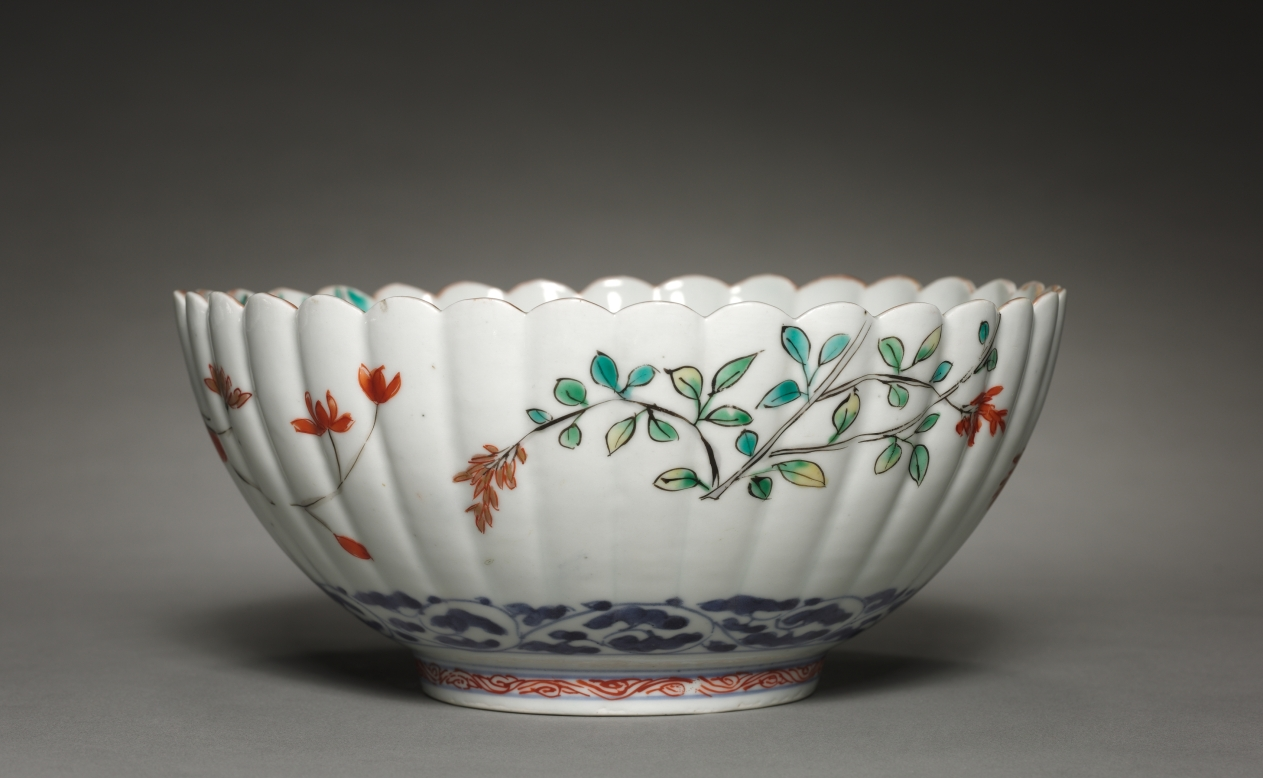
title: Fluted Bowl with Dragon, Butterfly, and Flowers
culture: Japan, Edo period (1615–1868)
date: early 1700s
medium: Porcelain with underglaze blue and overglaze color enamels and gold (Hizen ware, Kakiemon type)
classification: Ceramic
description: A dragon encircled by sprays of flowers and a butterfly enliven the interior of this fluted bowl. The exterior has similar decoration, with touches of gold on some petals. The flutes enhance both the visual and tactile experience; their tapered forms draw the eye from the edges inward and provide ridges for the hands.